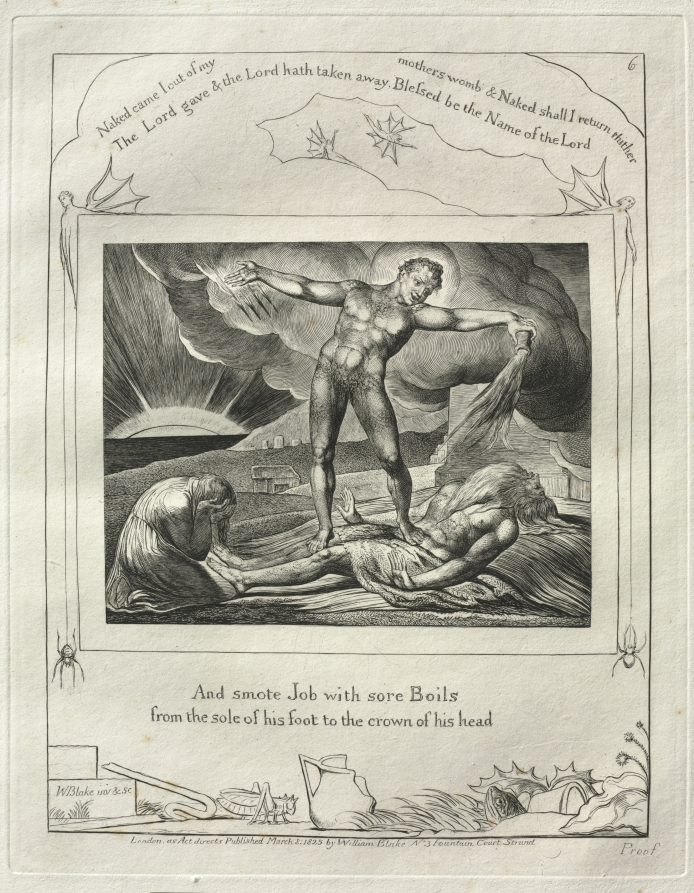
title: The Book of Job: Pl. 6, And smote Job with sore Boils / from the sole of his foot to the crown of his head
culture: England, 18th century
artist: William Blake (British, 1757–1827)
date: 1825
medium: engraving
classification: Portfolio